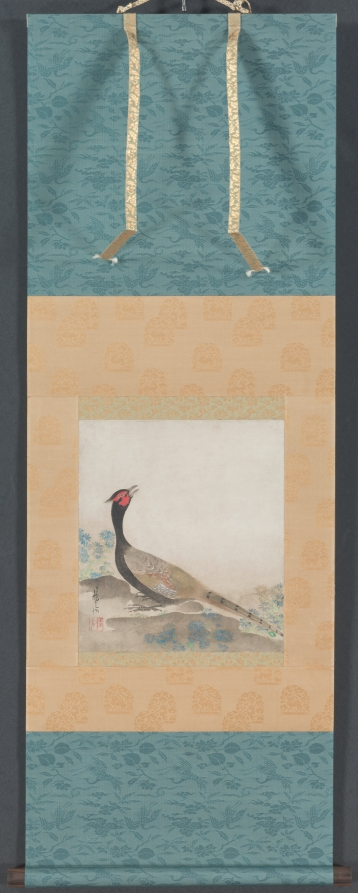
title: Pheasant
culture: Japan, Edo period (1615–1868)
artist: Ogata Kōrin (Japanese, 1658–1716)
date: 1658–1716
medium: hanging scroll; ink and color on silk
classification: Painting